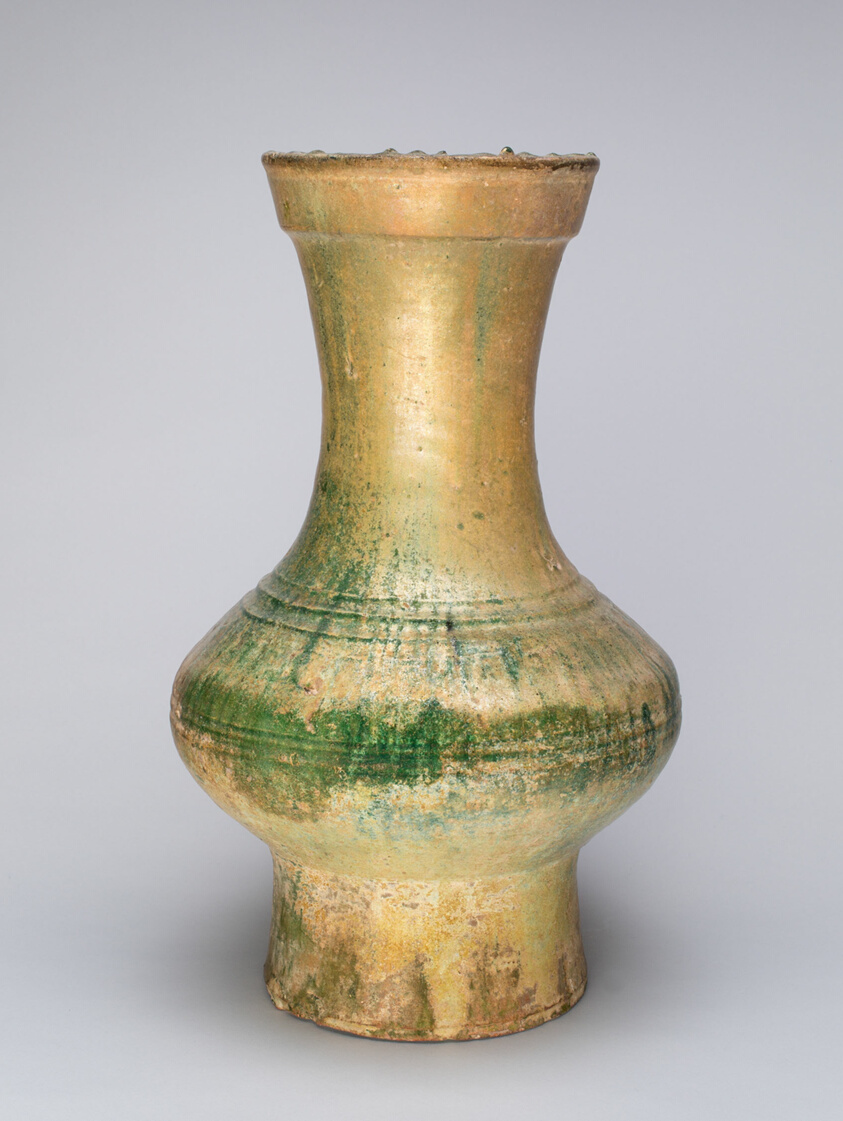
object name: Vessel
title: Jar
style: Chinese (culture or style)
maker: China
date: Han dynasty (206 B.C.–A.D. 220)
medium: Stoneware with lead green glaze and underglaze molded decoration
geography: China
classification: porcelain; ceramics; asian art; vessel